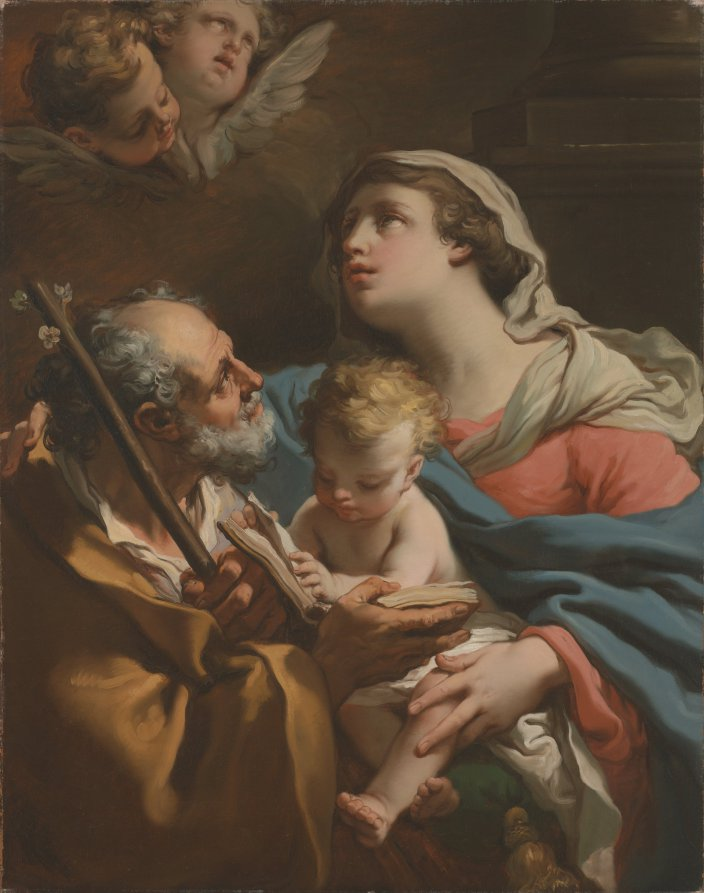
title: The Holy Family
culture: Italy, 18th century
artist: Gaetano Gandolfi (Italian, 1734–1802)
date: 1776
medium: oil on canvas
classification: Painting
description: A work of Gandolfi's later years, The Holy Family was exhibited in the religious festival at the church of San Procolo in Bologna in 1776. The painting's balanced composition, along with the suggestion of emotional connections among the figures, expresses the religious honesty of Gandolfi's art. Here St. Joseph holds the scriptures for the Christ child, who sits on his mother's lap; the elderly Joseph also holds the flowering rod, a sign from heaven that he was chosen to be Mary's husband. Joseph looks with concern toward Mary, who in turn looks up toward the cherubim hovering in a cloud at the upper left. Viewers of the private devotional painting were meant to understand that the young Christ reads of his future in the gospels, and that the suffering he will endure is reflected in Mary's sad gaze. Gandolfi was the most popular member of a prominent artistic family in Bologna. As both draftsman and painter he distinguished himself in religious, mythological, and genre subjects and was admired by his Italian and English patrons. He is known for his down-to-earth naturalism, typical of Bolognese art. The frame—although modern—is a "Gandolfini," so-called because the style was created for paintings by members of the Gandolfi family.